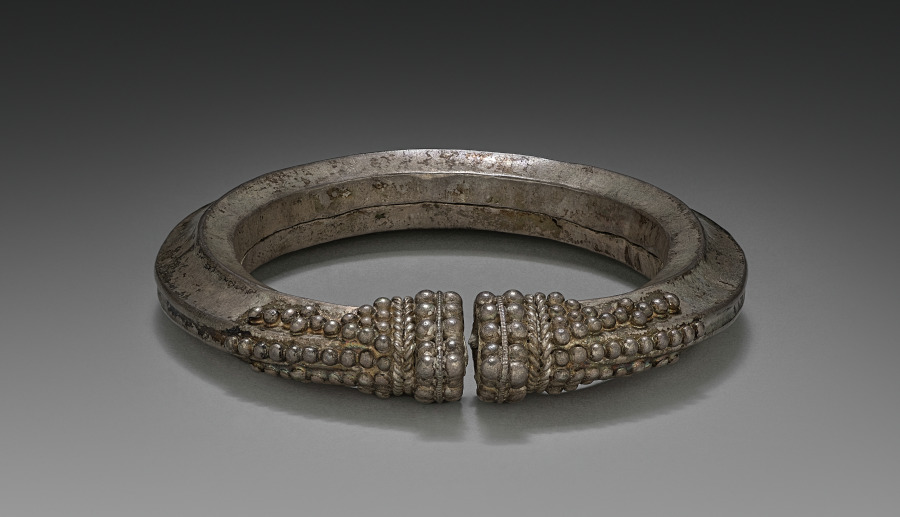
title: Bracelet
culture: India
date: early 1900s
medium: silver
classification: Jewelry